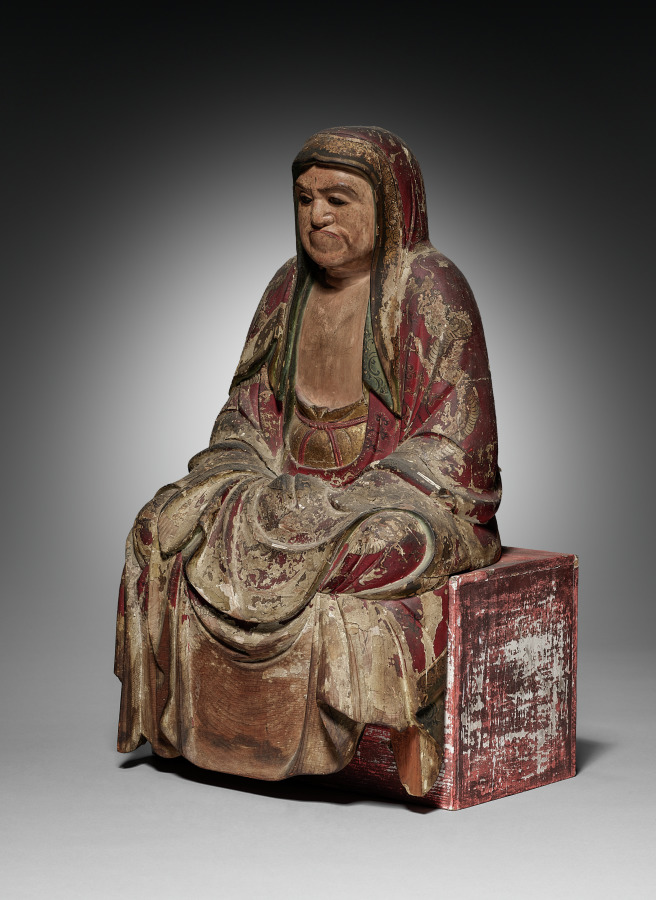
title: Rakan (Arhat) ?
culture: Japan, Edo period (1615–1868)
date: early to mid-1800s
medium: wood, gesso, pigment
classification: Wood